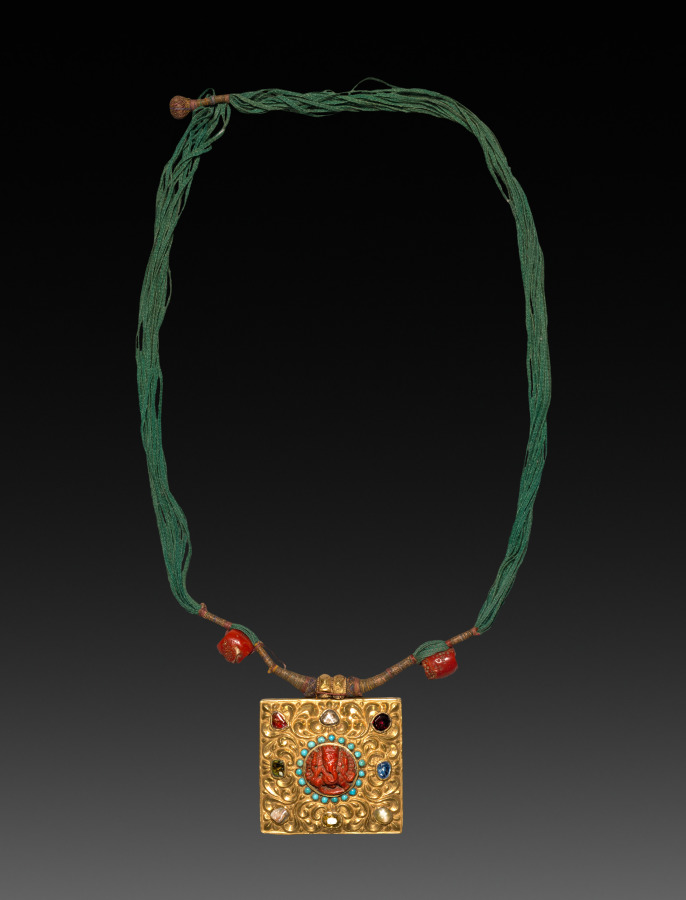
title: Charm Case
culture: Tibet, 19th century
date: 1800s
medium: gold with jewels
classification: Jewelry